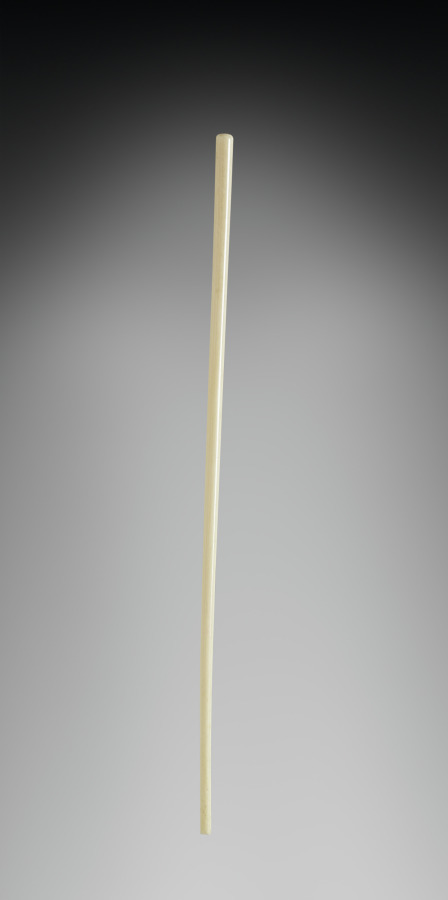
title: Chopstick for Chopstick and Knife Kit -Souvenir Trade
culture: Japan, Meiji period (1868–1912) to Taishō period (1912–26)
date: early 1900s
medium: enamel, wood, walrus ivory or bone, metal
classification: Implements